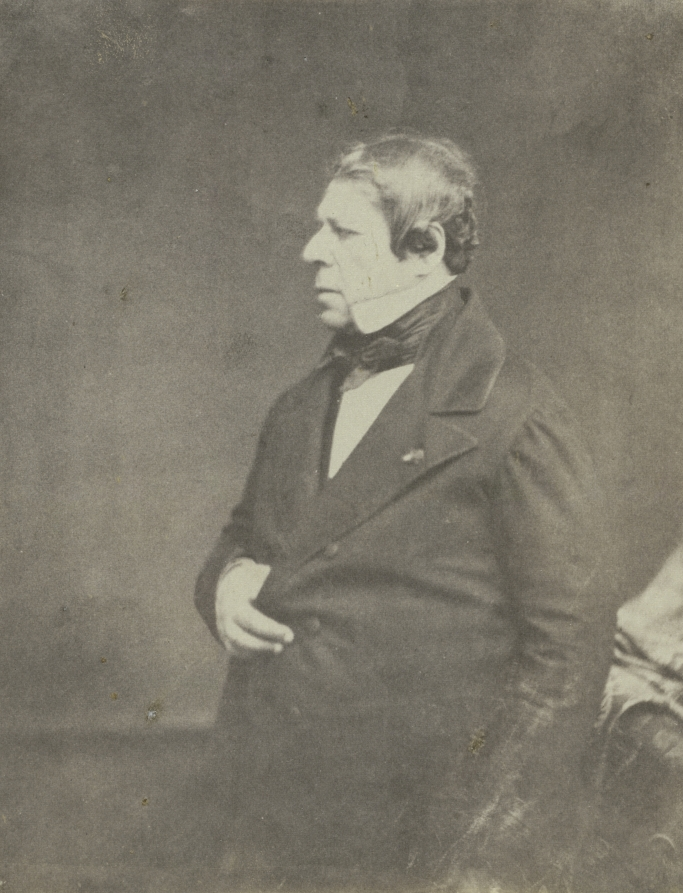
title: Jean Auguste Dominique Ingres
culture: France, 19th century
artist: Victor Laisné (French, 1825–1897)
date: 1852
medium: salted paper print from a paper negative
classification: Photograph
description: This portrait of Jean-Auguste-Dominique Ingres (1780-1867), one of the most admired painters in France at the time the image was made, is an early example of celebrity photography. Made by Victor Laisné, this print exemplifies his ambitious attempts at commercial paper negative portraiture. Unembellished and direct, the composition portrays Ingres in profile, revealing the upper three-quarters of his figure. Little is known about Laisné and his brief photographic career in the early 1850s. He contributed a number of images of noted artists to an ambitious project-Théophile Silvestre's Portraits des artistes vivants et reproductions de leurs principaux ouvrages par la photographie [Portraits of living artists and reproduction of their principal works through photography](1853).